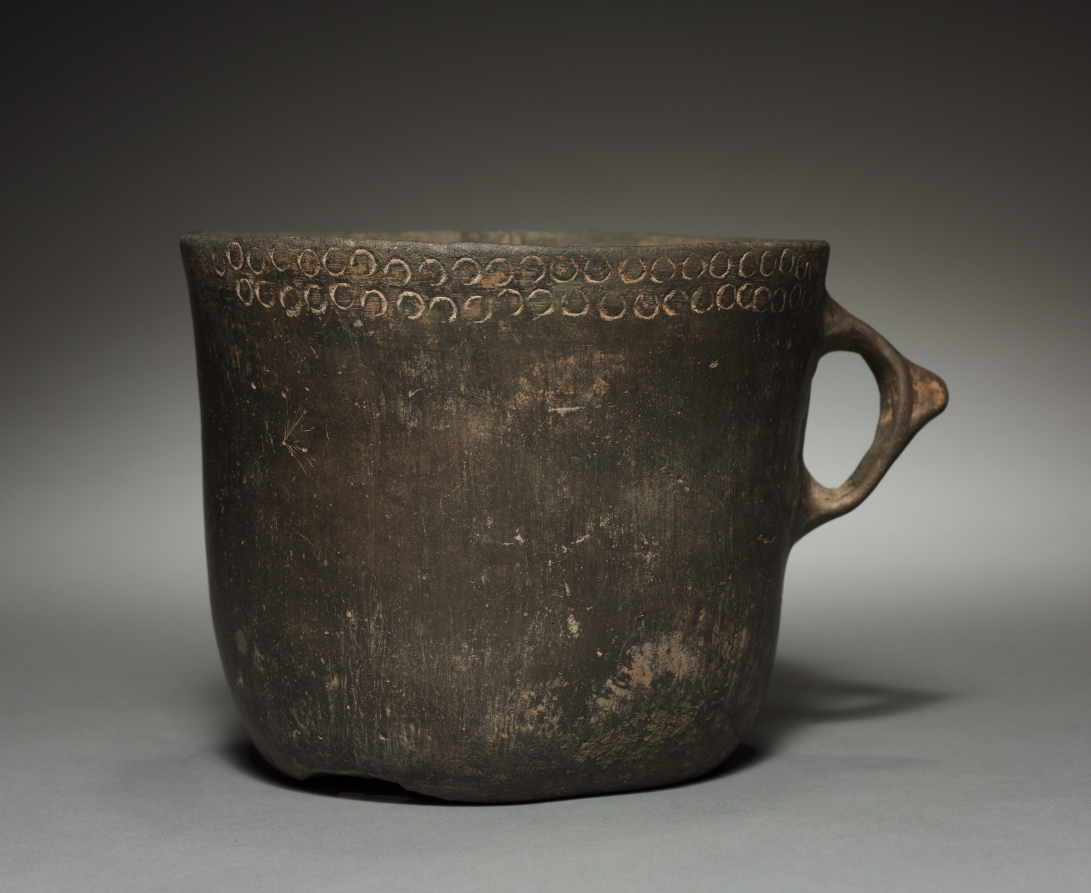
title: Drinking Vessel with Handle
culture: Argentina, Cienga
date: c. 600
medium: earthenware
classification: Ceramic